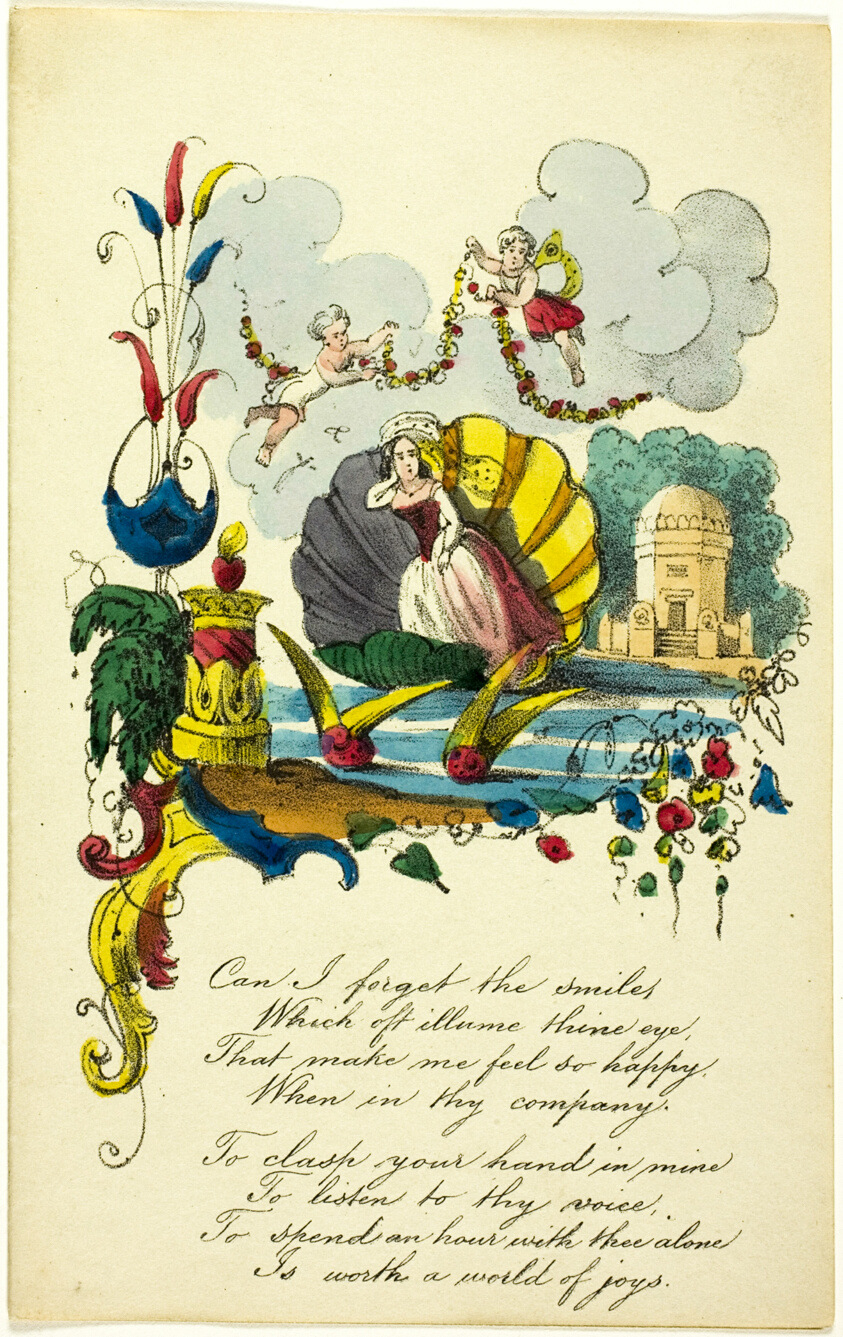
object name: Print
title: Can I Forget the Smiles (valentine)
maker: Unknown Artist; English, 19th century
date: c. 1840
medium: Lithograph with hand-coloring on ivory wove paper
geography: England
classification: valentine; prints and drawing; print